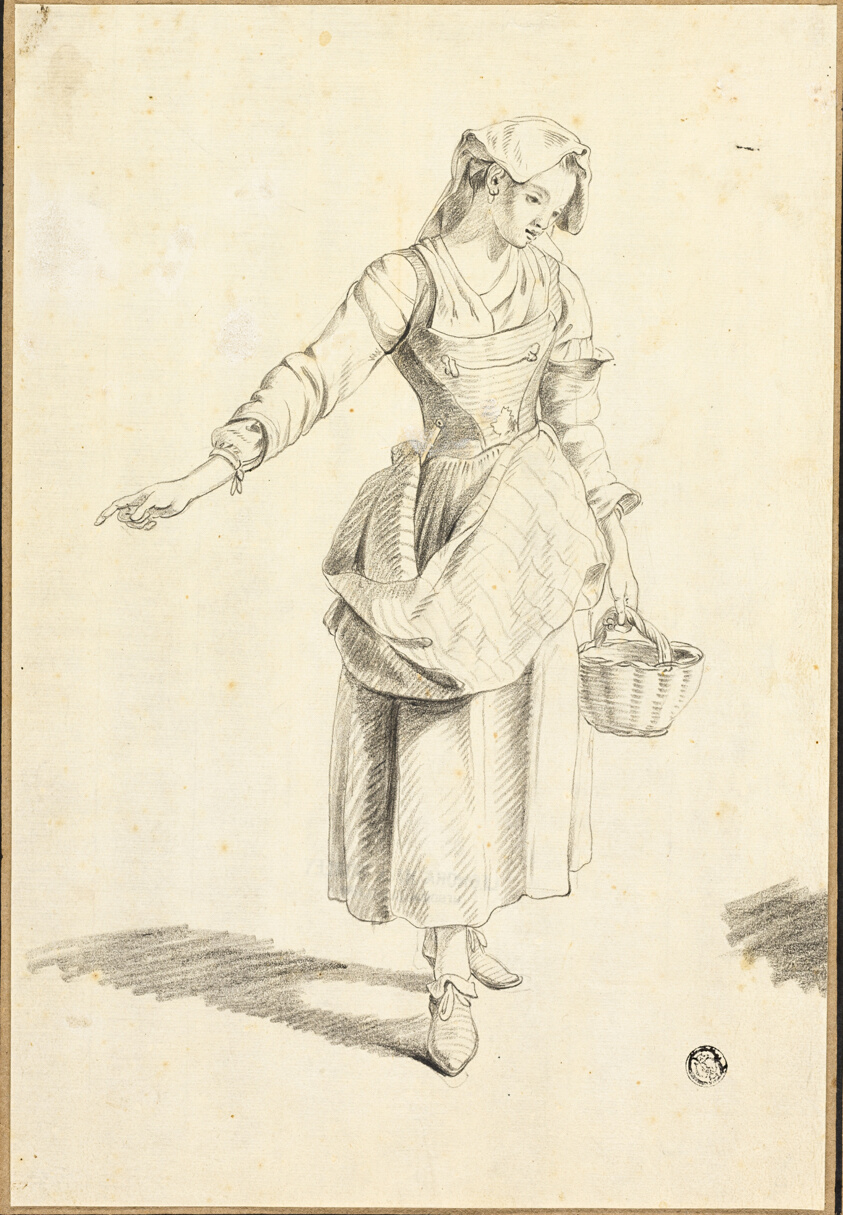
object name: Drawing and Watercolor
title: Italian Peasant Girl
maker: Jacob Philipp Hackert (German, 1737-1807); or Unknown German artist (18th Century)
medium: Black chalk, on ivory laid paper, tipped on brown wove paper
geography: Germany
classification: chalk; drawings (visual works); prints and drawing